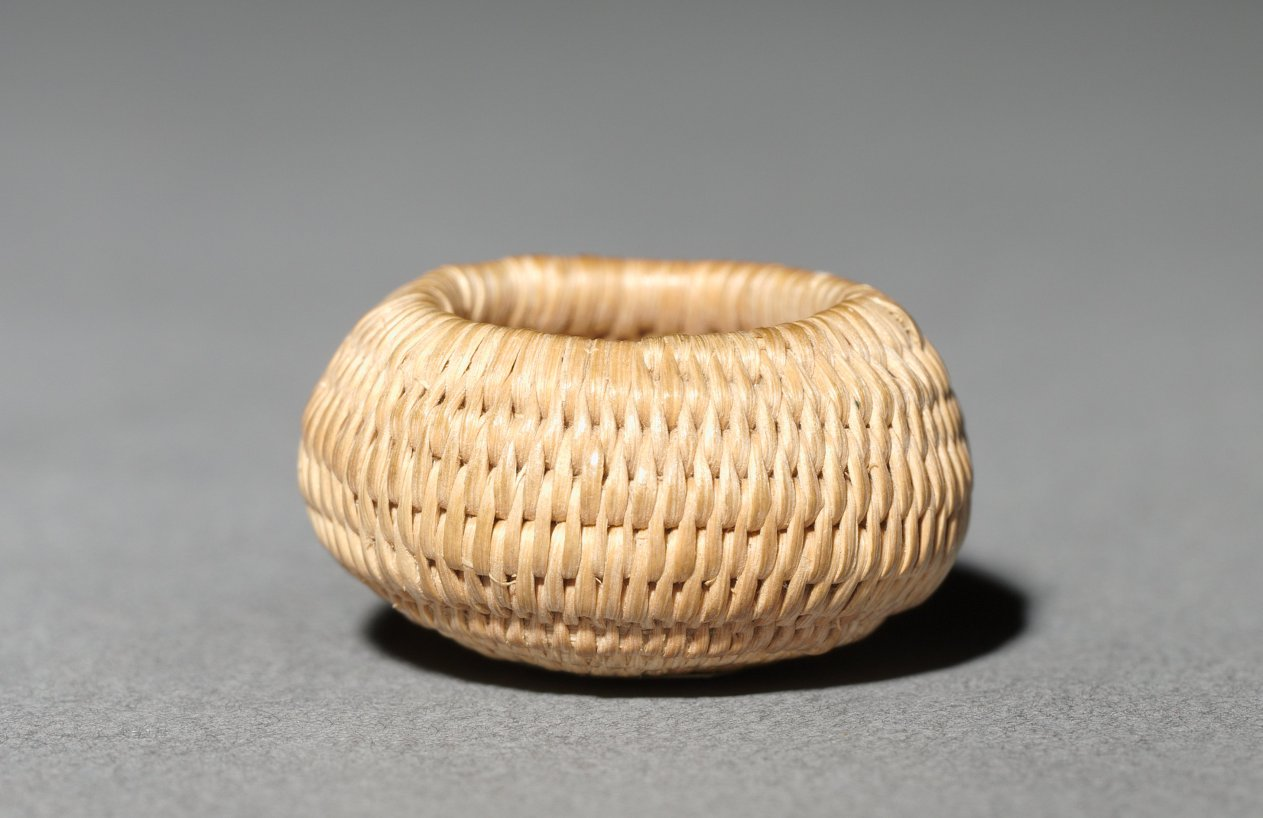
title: Miniature Basket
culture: America, Native North American, Southwest, Arizona, Akimel O'odham (Pima), Unassigned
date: before 1923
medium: plant fiber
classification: Basketry